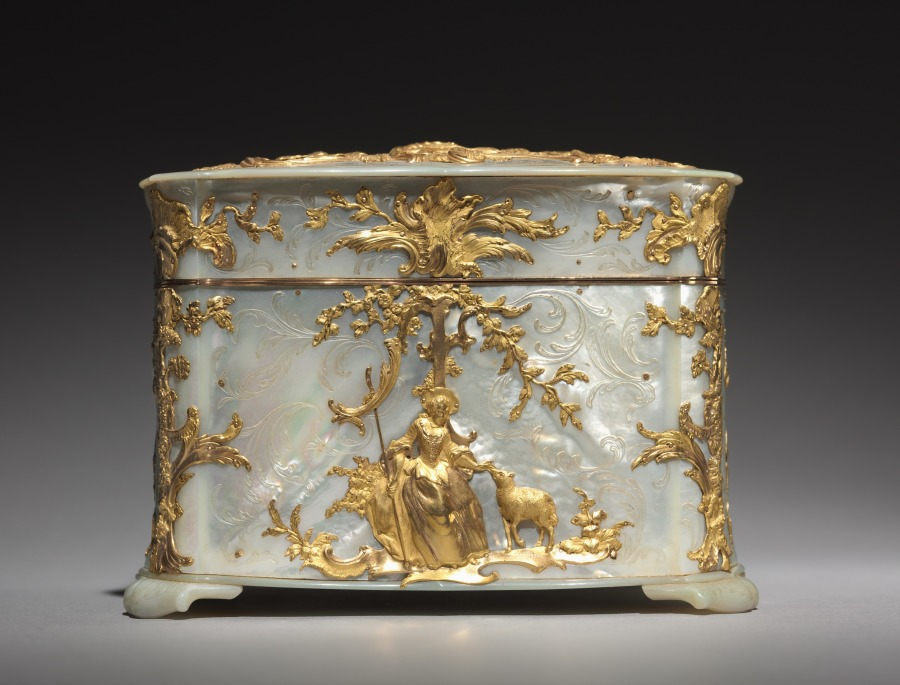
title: Sewing Box with Implements (Nécessaire)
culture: Austria, possibly Vienna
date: c. 1765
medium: gold and mother-of-pearl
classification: Miscellaneous